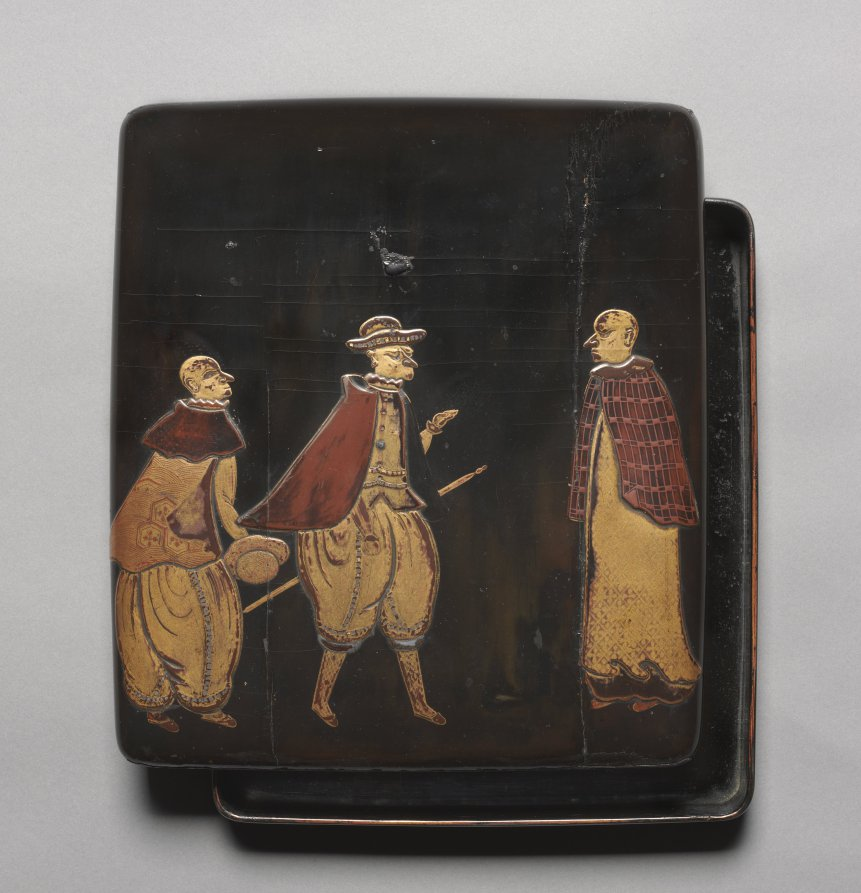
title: Writing Box (Suzuribako) with Europeans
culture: Japan, Edo period (1615–1868)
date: 1800s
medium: lacquered wood with gold maki-e, silver inlay and red lacquer on black ground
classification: Lacquer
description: The two people on the left of this box lid's design are Portuguese traders, identifiable by their balloon-shaped pants. Facing them is a Jesuit priest in a long robe. Portuguese ships arrived in Japan in the 1540s. Imagery first made to document the appearance of the foreigners survived as decoration on later objects like this one.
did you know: The Japanese term nanban 南蛮 is used to describe designs like the one on this box.